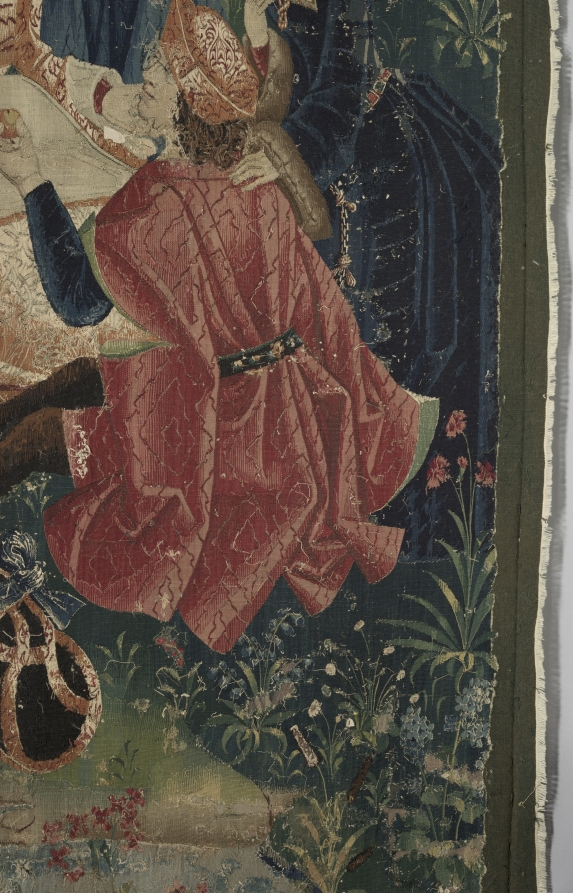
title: Time (from Chateau de Chaumont set)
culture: France, Lyon(?), early 16th century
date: 1512–15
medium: silk and wool; tapestry weave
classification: Tapestry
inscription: French verse in Gothic letters translates as follows: "One sees the weather adorned in green, Sometimes as pleasing as an angel; To suddenly change and be quite strange, The weather never stays the same."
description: Pierre Sala, who likely commissioned the set, is portrayed as the richly attired central figure offering a bouquet, a symbol of knowledge, to Éléonore, his daughter. Éléonore is pregnant, revealed by her upturned skirt and the persimmon in her husband Hector’s hand. Hector’s mother, Marguerite, in dark attire, will wed the widowed Sala in 1519. They appear in front of the royal chateau of Blois. The figures at the right convey Sala’s advice to his children. Time (the old man with the staff) with Clio, the Muse of History, standing on his shoulders, is being attacked by a Herculean youth wielding a stick. With this allegory, Sala is explaining that youth is ignorant of the complexities of life and time. The small unicorn at the far right represents the soul. The verse in Old French at the top refers to changing time: One sees Time adorned with green foliage, Sometimes as pleasant as an angel, Then suddenly change and become quite strange. Never does Time persist in one state.